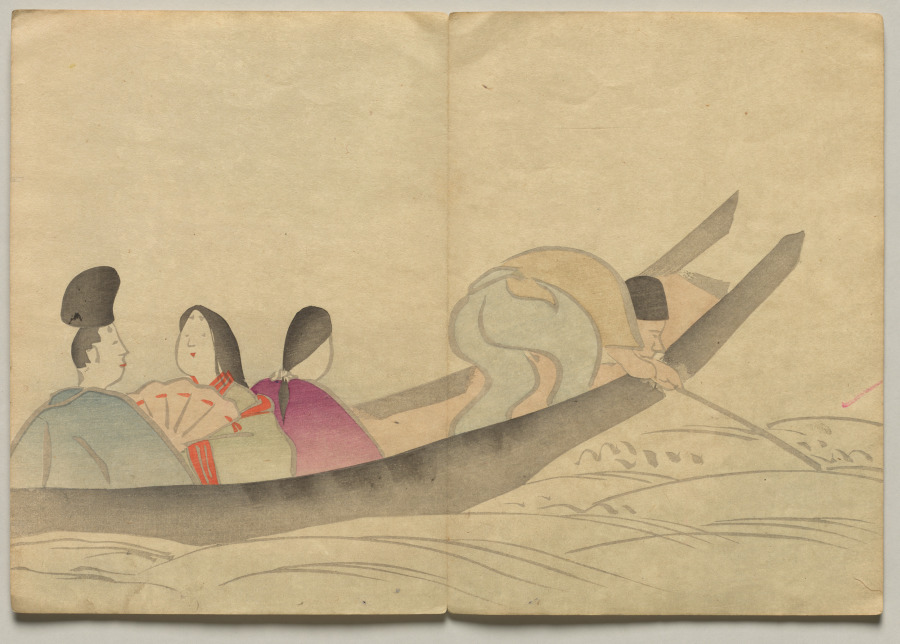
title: Scene from The Kōrin Picture Book (Volume 2)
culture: Japan, Edo period (1615–1868)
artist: Nakamura Hōchū (Japanese, d. 1819)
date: 1800s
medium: color woodblock printed book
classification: Bound Volume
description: Ogata Korin (1658-1716) was one of the most admired artists of Rimpa, or "decorative school painting." These books by the charming later-generation Rimpa artist Hochu record Korin's inventive designs.